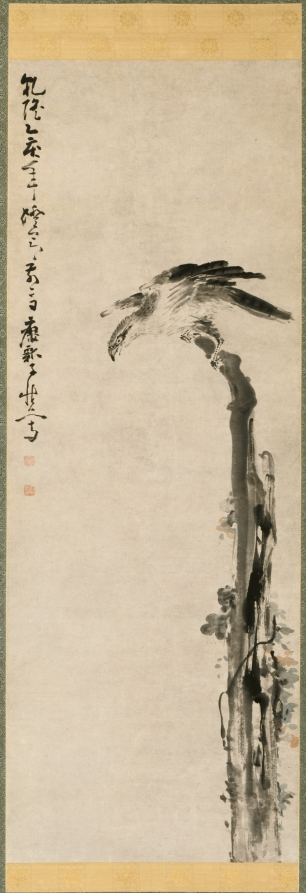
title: Eagle on a Tree Trunk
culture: China, Qing dynasty (1644–1911), Qianlong reign (1736–95)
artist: Huang Shen (Chinese, 1687–after 1768)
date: 1755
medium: Hanging scroll; ink and color on paper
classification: Painting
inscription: 乾隆乙亥年燈節前二日癭瓢子慎写。 [印]黃慎; 恭壽。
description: Huang Shen’s swift painting style is paralleled in his calligraphy. The vertical line in running script echoes the fluid form of the eagle on a tree trunk covered with a twisted vine. A native of Fujian province, Huang came to Yangzhou in 1724 to make his living as a painter. He needed years to develop a style that met the taste of his clients. He eventually became known as a figure painter and as one of the Eccentrics from Yangzhou, a group of local artists known for their unorthodox painting style.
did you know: With its wings partially lifted and sharp beak open in expectation, the eagle seems intent on some unseen prey below.